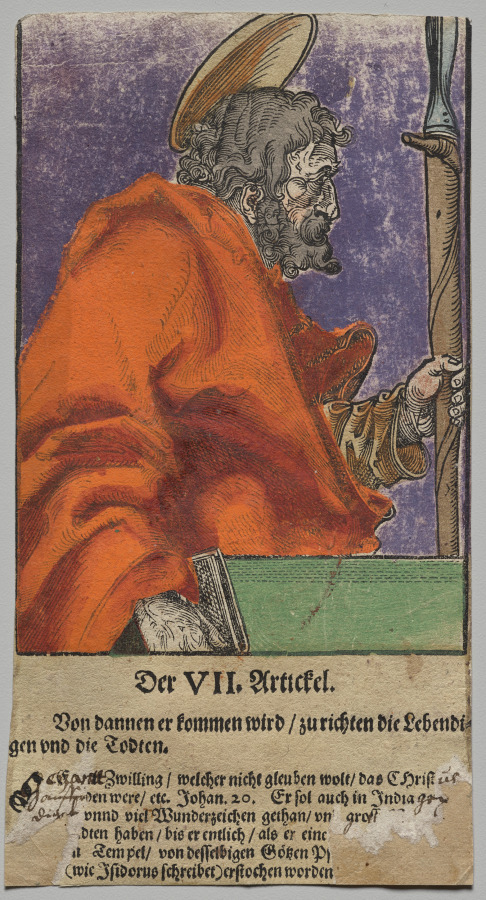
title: Thomas from Christ, the Apostles, and Saint Paul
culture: Germany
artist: Lucas Cranach the Elder, After (German, 1472–1553)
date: 1563/64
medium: Woodcut with letterpress text, hand colored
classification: Print